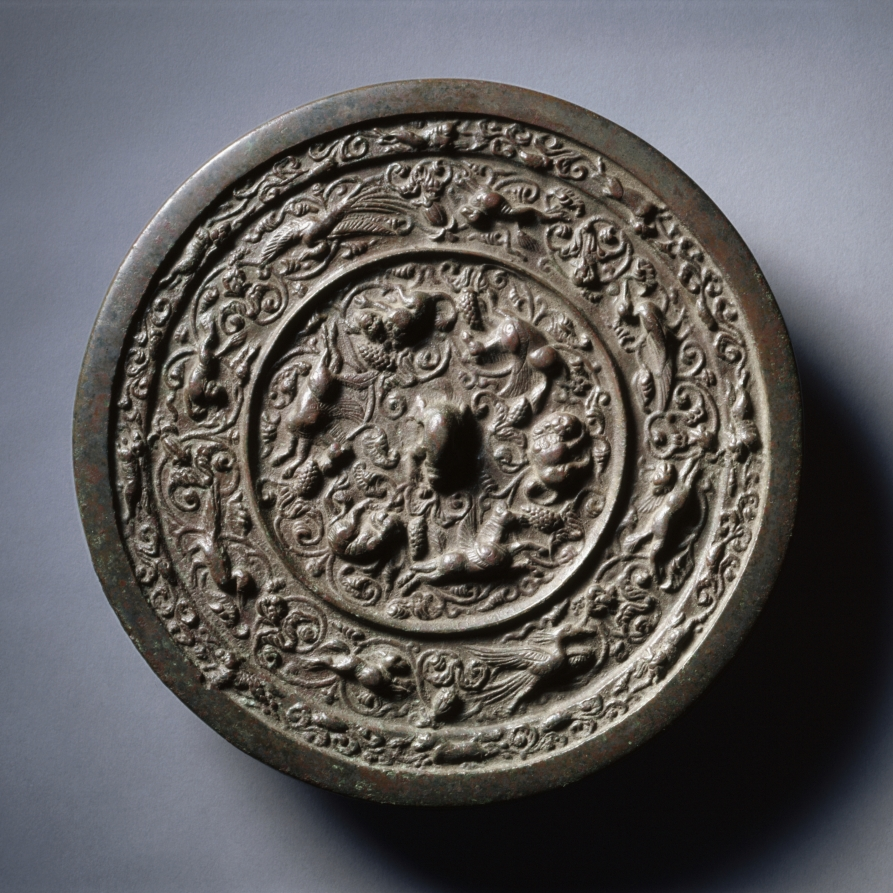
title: Mirror with Auspicious Animals, Celestial Horses, and Grapevines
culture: China, Jin dynasty (1115-1234)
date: early 1100s–mid-1200s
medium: bronze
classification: Metalwork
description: The mirror is covered with thick layers of corrosion that have been partially scraped off the reflecting surface. A small triangular area of undisturbed corrosion remains.